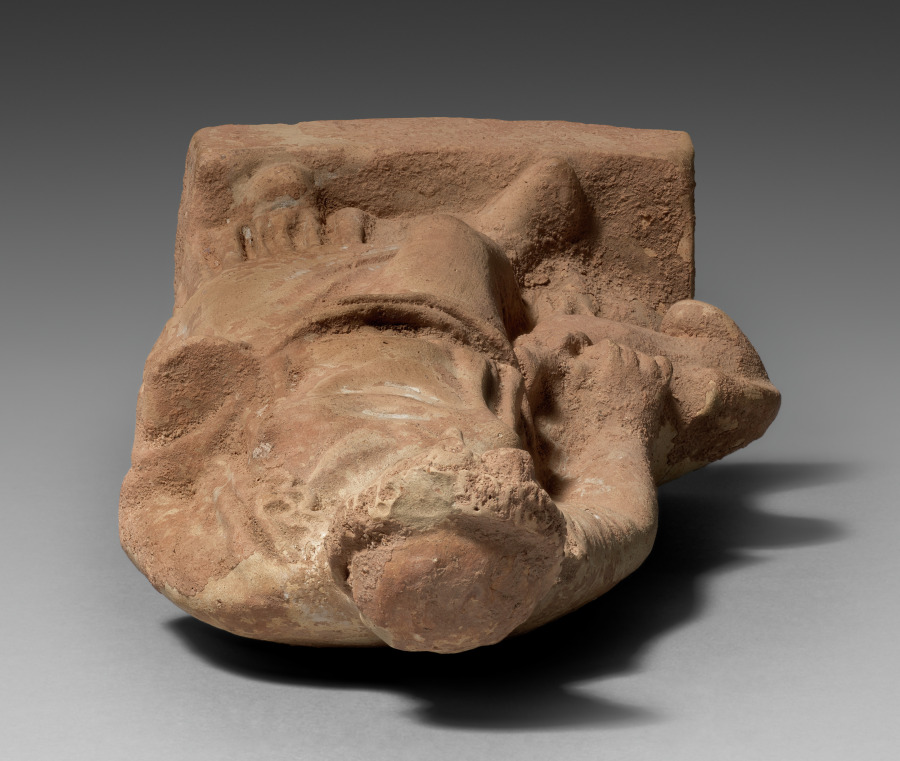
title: Figurine of Demeter with Pig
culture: Greece, Athens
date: 400s BCE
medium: terracotta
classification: Sculpture